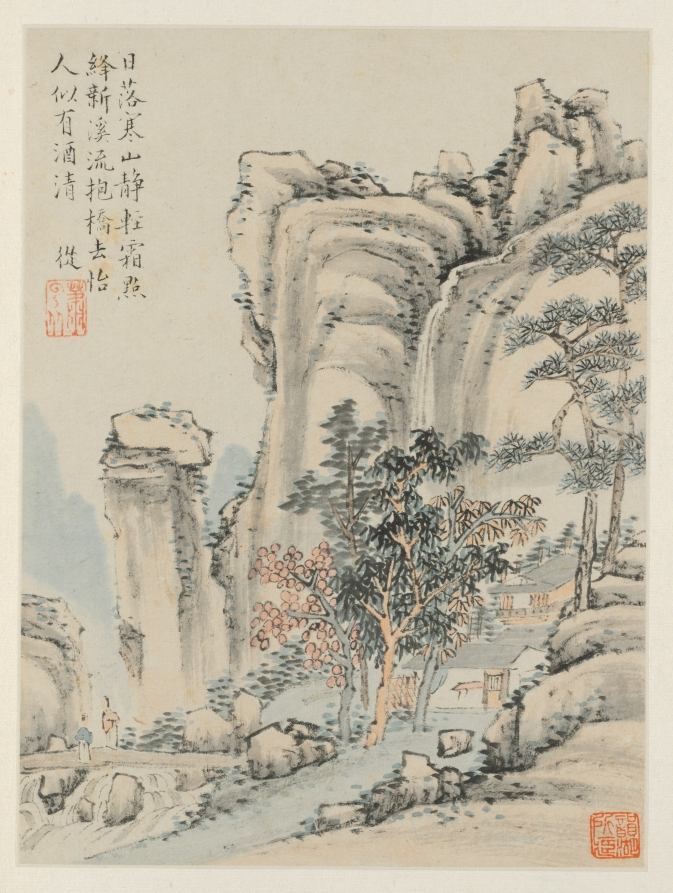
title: Album of Seasonal Landscapes, Leaf E (previous leaf 3)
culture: China, Qing dynasty (1644-1911)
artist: Xiao Yuncong (Chinese, 1596–1673)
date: 1668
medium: album leaf; ink and light color on paper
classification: Painting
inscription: Artist's inscription, signature, and 8 seals. Leaf C. In the setting sun, the cold mountain is quiet;/ Light frost dots the newly reddened leaves./ Rushing waters seem to embrace the bridge, then flow away;/ The water is as pleasing and clear as wine. Yuncong [seal] Xiao Yuncong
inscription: 9 additional seals: 2 of Chen Yixi 陳奕禧 (1646-1709); 4 of Li Yufen 李玉棻 [Li Yunhu 李韵湖] (active mid-1800s); 3 unidentified.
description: Throughout his lifetime, Xiao Yuncong visited Nanjing and Yangzhou, cities embedded in the fertile and water-rich Jiangnan region, as reflected in his paintings. Xiao painted from nature, and his landscapes are informed by the seasons and his travels, as well as by his experience as a print designer. Xiao’s fresh, light colors continue to appear in later Shanghai school paintings. This album was formerly in the collection of Li Yufen in Yangzhou and then owned by Wu Hufan in Shanghai. While the artist impressed his seal consistently below his poetic inscriptions in the upper parts of the composition, the red seals on the margins and in the lower corners of the paintings are impressions by the album’s previous owners.